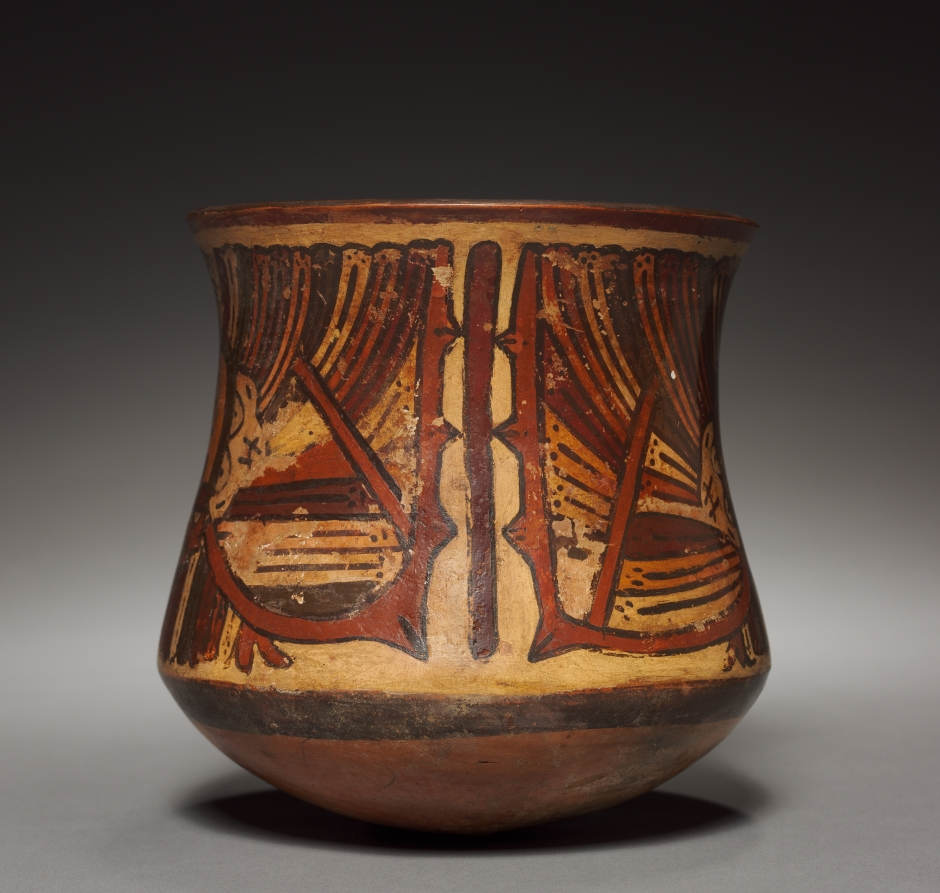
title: Vase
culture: Peru, South Coast, Nasca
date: 2000–20 BCE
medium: pottery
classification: Ceramic